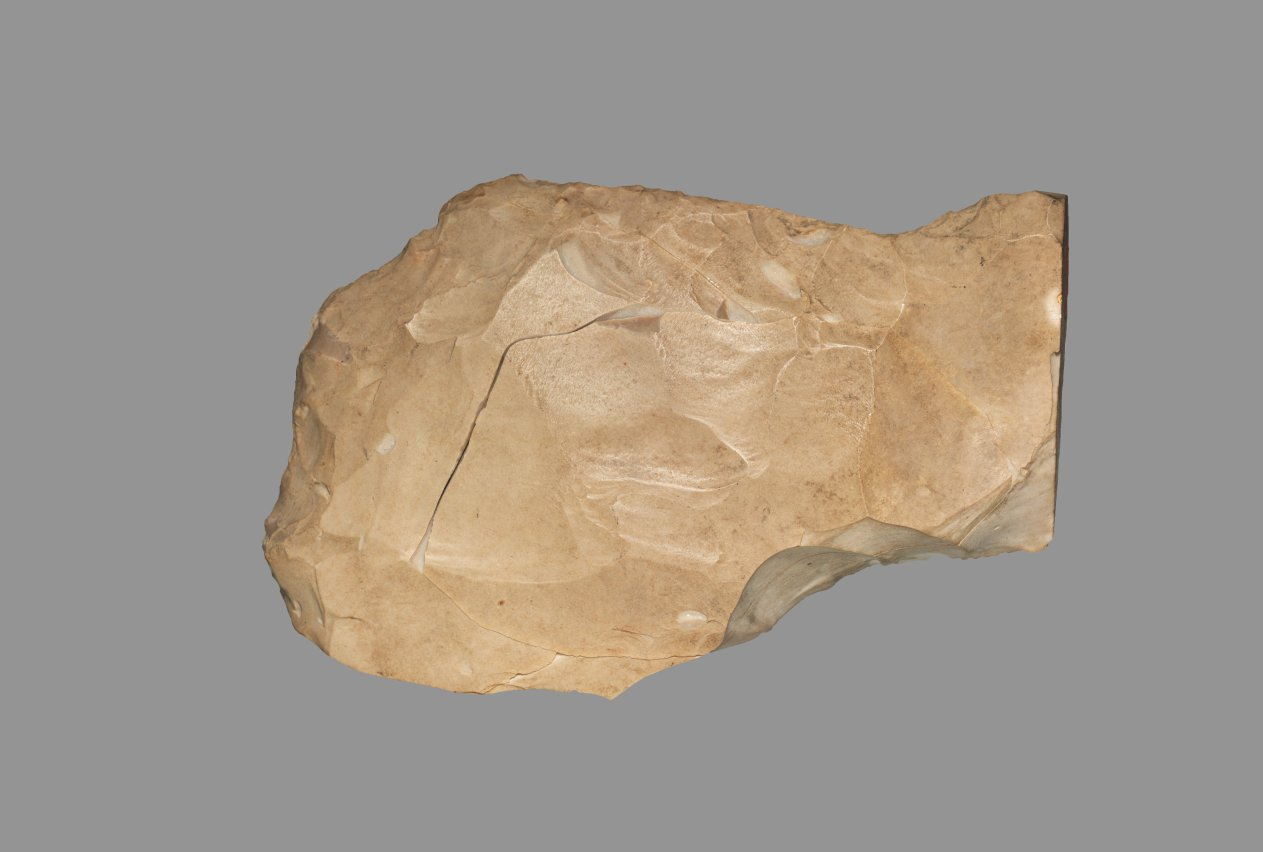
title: Ax Head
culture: Egypt, Haraga, excavated in 1914, Middle Kingdom (2040–1648 BCE), Dynasty 12, reign of Senusret III (1878–1839 BCE)–Dynasty 13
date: 1886–1648 BCE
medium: flint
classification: Implements